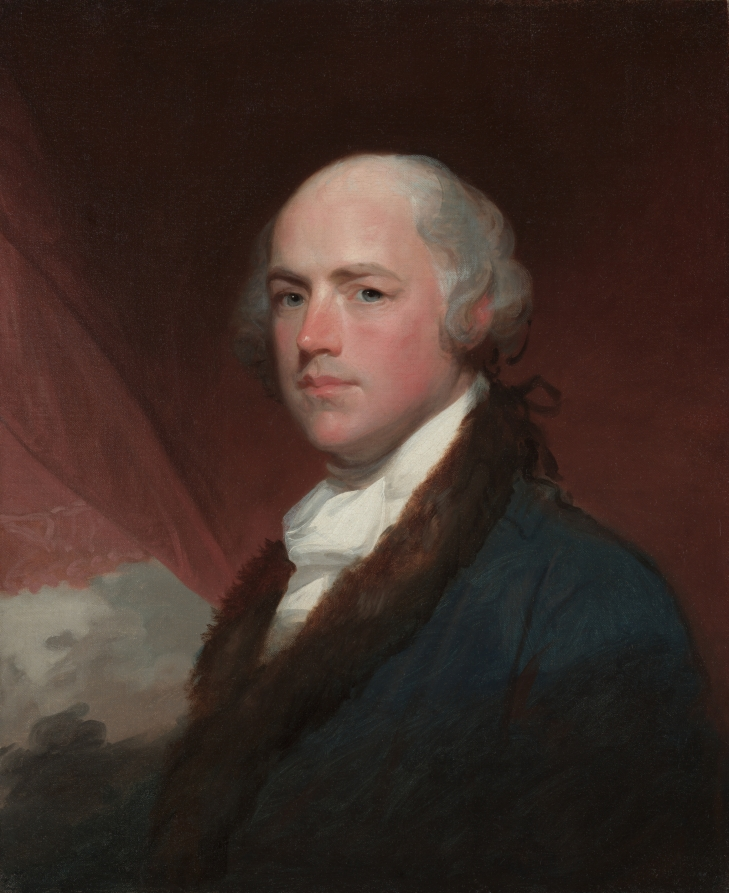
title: Wilson Cary Nicholas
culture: America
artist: Gilbert Stuart (American, 1755–1828)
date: c. 1805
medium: oil on canvas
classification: Painting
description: Wilson Cary Nicholas was born January 31, 1761, into a politically powerful family from Williamsburg, Virginia. In 1781, he left William and Mary College to join the Continental Army, in which he commanded George Washington’s lifeguard until it was disbanded in 1783. As a member of the Constitutional Convention, he returned to Virginia to campaign for the ratification of the U.S. Constitution in that state, where it passed by a margin of only ten votes. He then served several terms in the House of Delegates before being elected to the U.S. Senate and the House of Representatives. He became the governor of Virginia in 1814, retiring in 1819 due to poor health and spending his remaining days in the home of his son-in-law, Thomas Jefferson Randolph, President Thomas Jefferson’s grandson. He died on October 20, 1820, and is buried at Monticello, the president’s former estate.